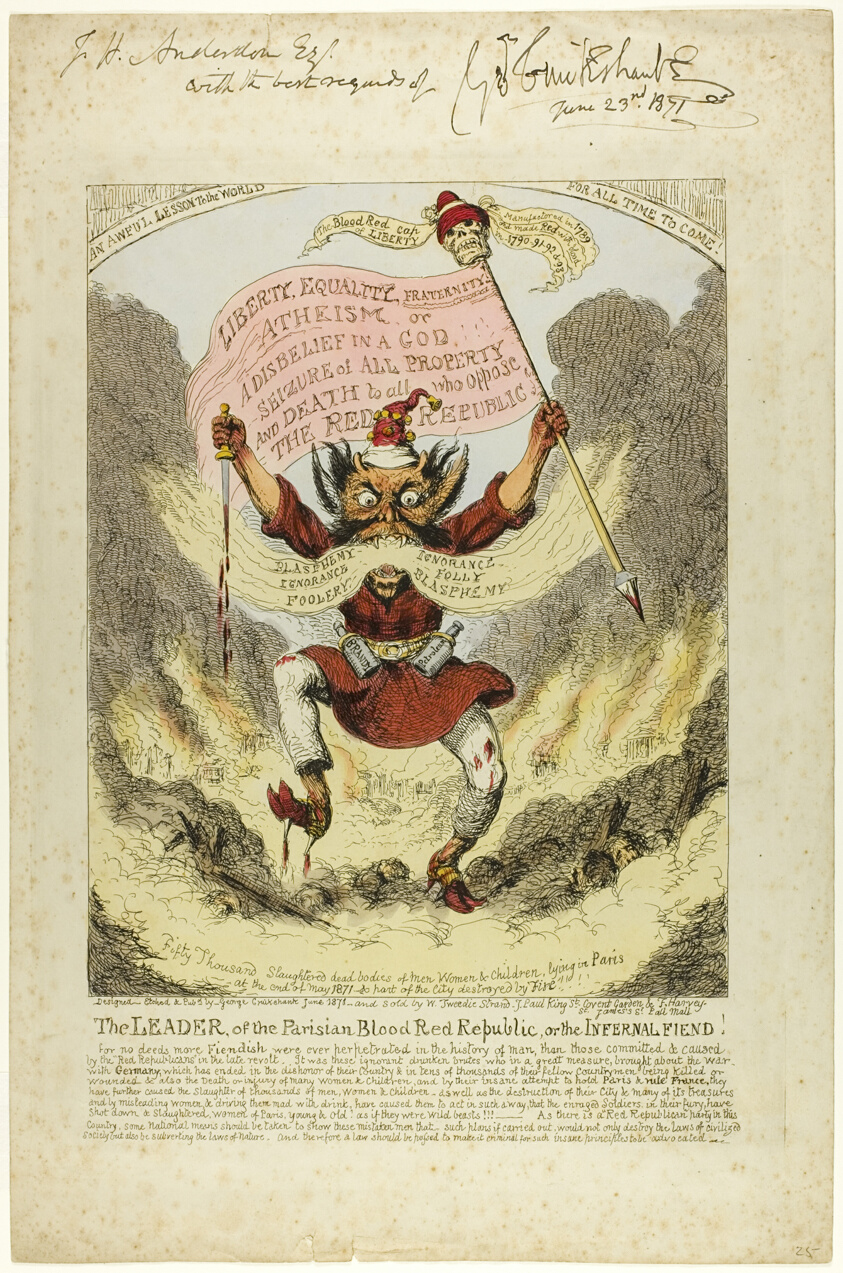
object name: Print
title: The Leader of the Parisian Blood Red Republic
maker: George Cruikshank (English, 1792-1878)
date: published June 23, 1871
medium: Etching on ivory laid paper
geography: England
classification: etching; print; prints and drawing